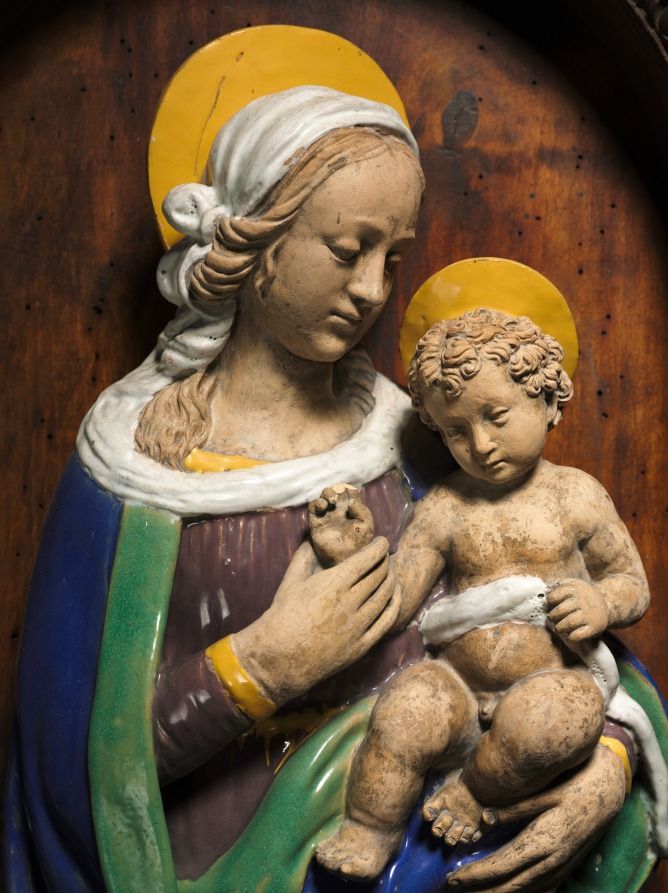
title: Virgin and Child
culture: Italy, late 15th-early 16th Century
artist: Benedetto Buglioni (Italian, 1461–1521)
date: 1500–1510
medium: glazed terracotta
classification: Sculpture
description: This small devotional object differs stylistically from Buglioni's Madonna and Child Enthroned with Saints Francis and Anthony Abbot (1921.1180), also in the museum's collection. In contrast to the other work, the faces of the Madonna and Child are significantly less expressive, and the passages of exposed skin have been left unglazed. The Madonna holds a nude Christ on her left arm and wears a mantle of blue with green lining and a maroon tunic with a yellow collar and cuffs. Her bright yellow shoes and the purple of her tunic are characteristic of Buglioni's color scheme and can also be seen in the other work. The tabernacle frame is probably contemporary to the figures, although it may not have been created specifically for this altarpiece. Buglioni likely worked in the studio of Andrea della Robbia, where he would have studied the family's techniques for glazing terracotta. The frame is classically inspired, with Corinthian capitals and Buglioni's characteristic egg and dart moldings. The facial type in this Madonna and Child recalls Buglioni's Madonna delle Grazie in Florence's Palazzo Frescobaldi, and because of this similarity, the scholar Allan Marquand attributed the Cleveland Madonna and Child to Buglioni in 1921, although this attribution has since been questioned.